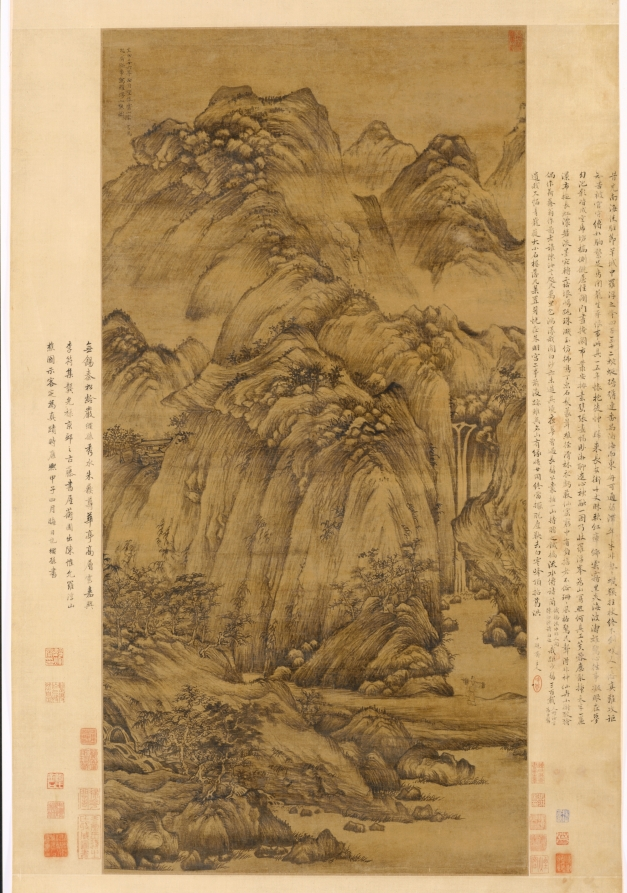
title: The Woodcutter of Luofu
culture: China, Yuan dynasty (1271-1368)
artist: Chen Ruyan (Chinese, c. 1331–1371)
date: 1366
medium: Hanging scroll; ink on silk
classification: Painting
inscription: 至正二十六年（1366）正月望後廬山汝言為思齊斷事寫羅浮山樵圖。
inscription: 2 colophons and 18 additional seals: 5 seals of Wang Shimin 王時敏 (1592–1680); 2 seals of Gong Xianglin 龔翔麟 (1658–1733); 1 colophon, dated 1684, of Yan Shengsun 嚴繩孫 (1623–1702); 1 colophon and 1 seal of Huang Ren (1683–1768); 2 seals of Lu Shusheng 陸樹聲 (3rd son of Lu Xinyuan 陸心源); 2 seals of T'ao Kuang; 1 seal of Tan Jing 譚敬 (20th c.); 3 seals of Zhang Heng 張珩 (1915–1963); 2 seals unidentified.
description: This landscape illustrates the traditionalism of Chinese painting: while the brush manner is novel, the composition is based on early Song dynasty (960-1127) models. The soft raveling brushstrokes and lumpy rock shapes are characteristic of the new 14th-century stylistic expression.